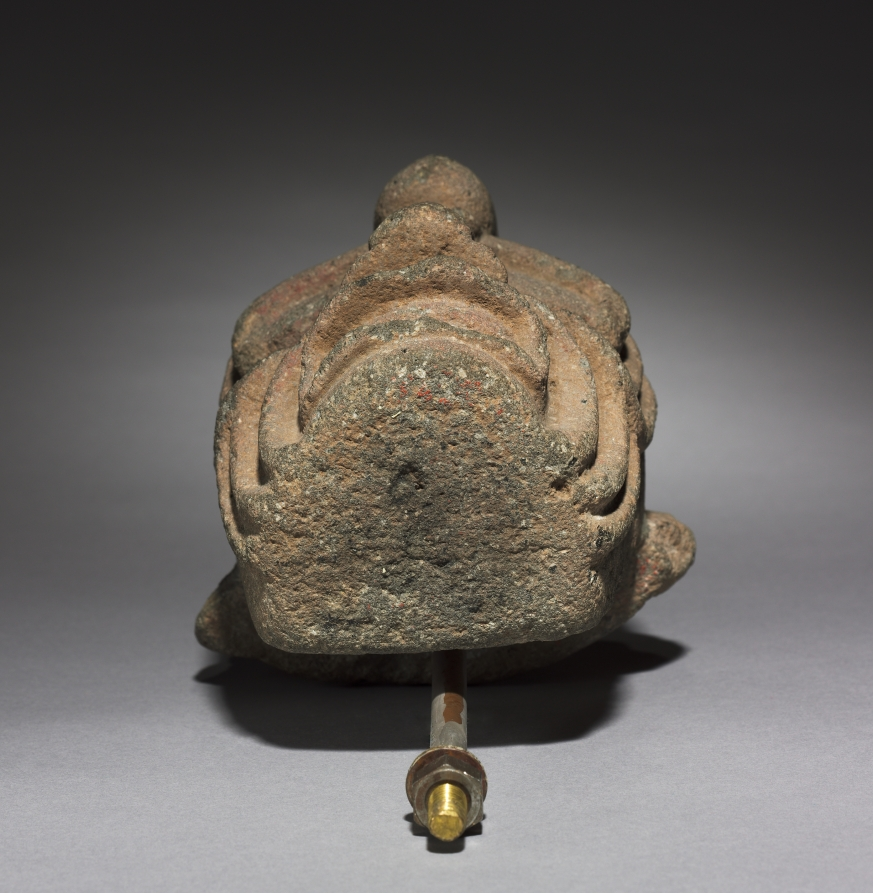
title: Ballgame Stone Head (Hacha)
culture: Mesoamerica, Classic Veracruz style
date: 450–550 CE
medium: gray volcanic stone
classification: Sculpture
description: Little can be said about this head’s identity and meaning, although the deep, dramatic furrows that line the face suggest age and the crest that curves across the top of the head has been compared to that of a bird. Such heads were one element of the regalia used in an ancient ballgame associated with complex mythology and equally elaborate art production on Mexico’s Gulf Coast, in present-day Veracruz.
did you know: This head’s identity is unknown but the deep furrows on the face suggest age.